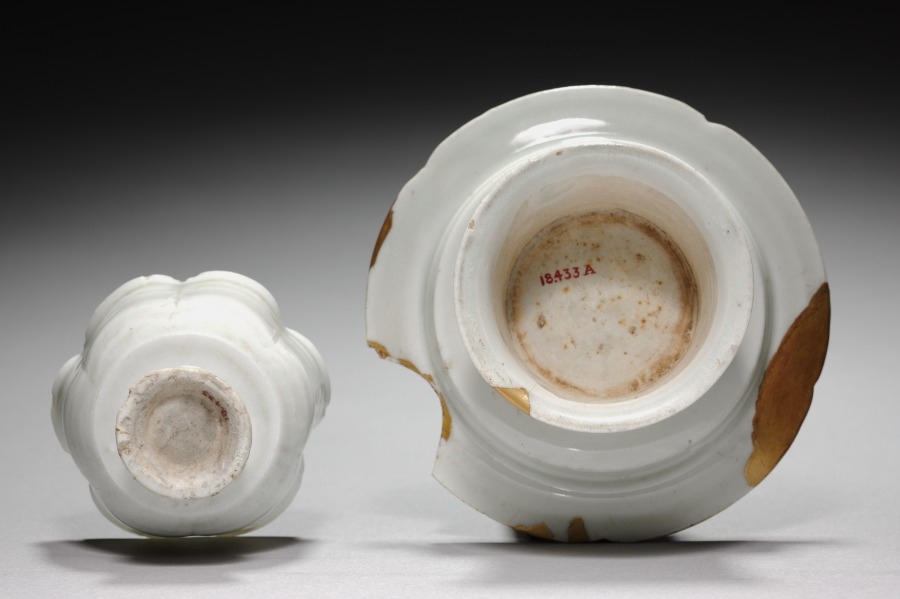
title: Cup and Stand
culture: Korea, Goryeo dynasty (918–1392)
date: 900s-1100s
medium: pottery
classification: Ceramic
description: As early as the seventh century, the practice of drinking tea and wine became an important part of elite culture in Korea. Elites of the Goryeo period commissioned a variety of types of utensils and vessels including this delicate-looking cup and cup stand, not only to make their drinking experience more exciting, but also to show their refined taste.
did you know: Many types of sophisticated stoneware examples such as this cup and cup stand were buried in the tombs of ruling class of the Goryeo dynasty (918–1392).